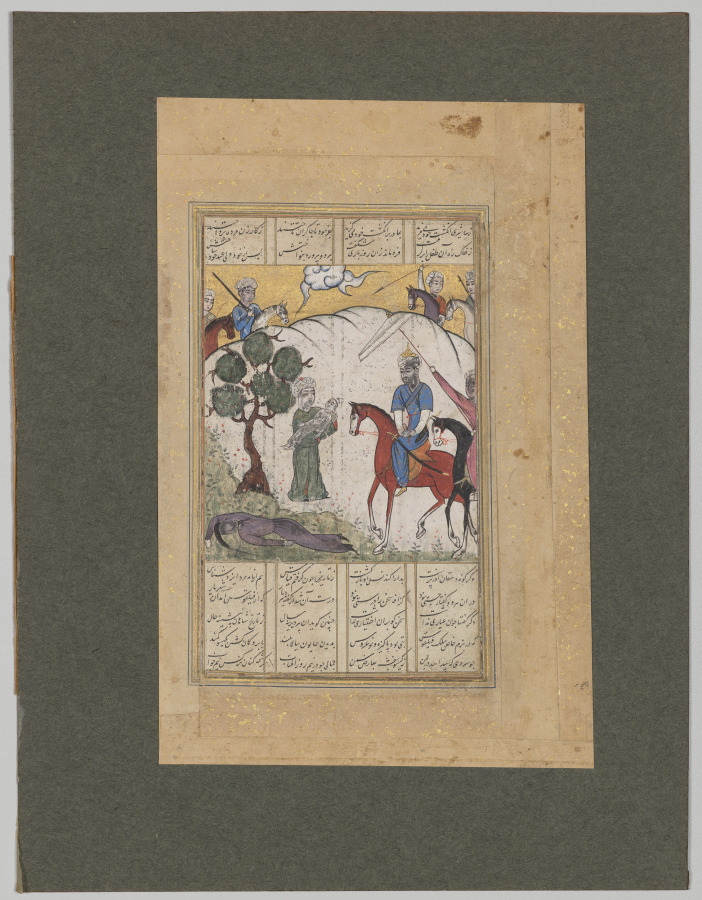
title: A scene of the life of Alexander from the Sharaf-nameh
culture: Iran, probably Shiraz, Safavid period (1501-1722)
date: 1500s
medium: Opaque watercolor, ink, and gold on paper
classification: Manuscript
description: This rare scene from the life of Alexander depicts a poor and pious woman falling into a desperate situation and giving birth to a son in some desolate place. Philip, the Macedonian ruler, is on a hunt and passes the ruin. Seeing the deceased woman with a hungry baby by her side, the King orders his followers to tend to the burial of the woman and brings up the orphan making him his crown prince.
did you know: This scene is from the Sharaf-nameh, the poetical version of the life of Alexander by the 12th-century Persian poet Niẓāmī Ganjavī.